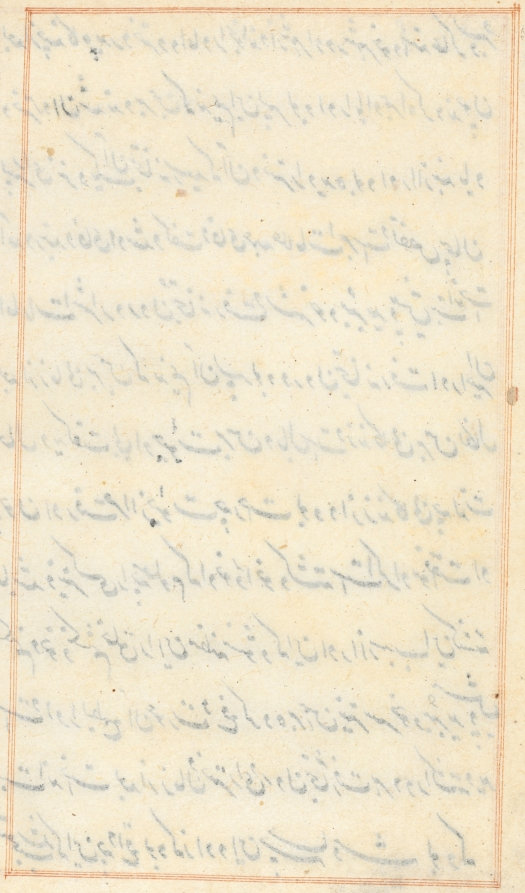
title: Page from Tales of a Parrot (Tuti-nama): text page (blank)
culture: Mughal India, court of Akbar (reigned 1556–1605)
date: c. 1560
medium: gum tempera, ink, and gold on paper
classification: Painting